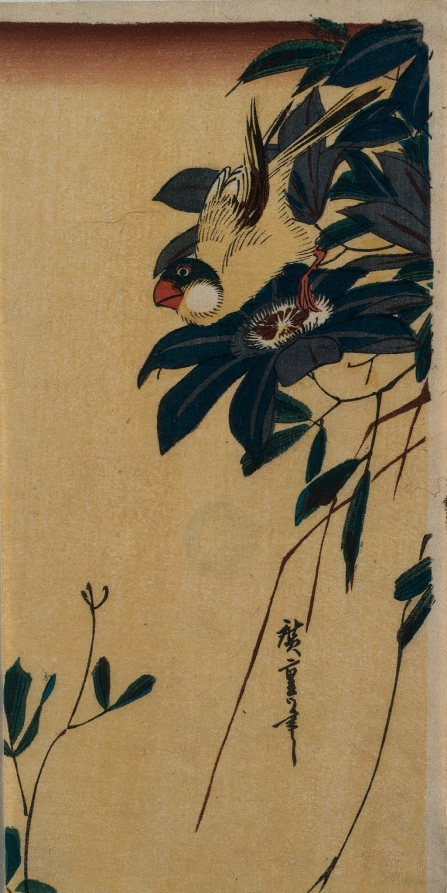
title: Grosbeak and Clematis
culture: Japan, Edo period (1615–1868)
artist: Utagawa Hiroshige (Japanese, 1797–1858)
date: mid-1830s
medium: color woodblock print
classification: Print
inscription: Signature: Hiroshige hitsu